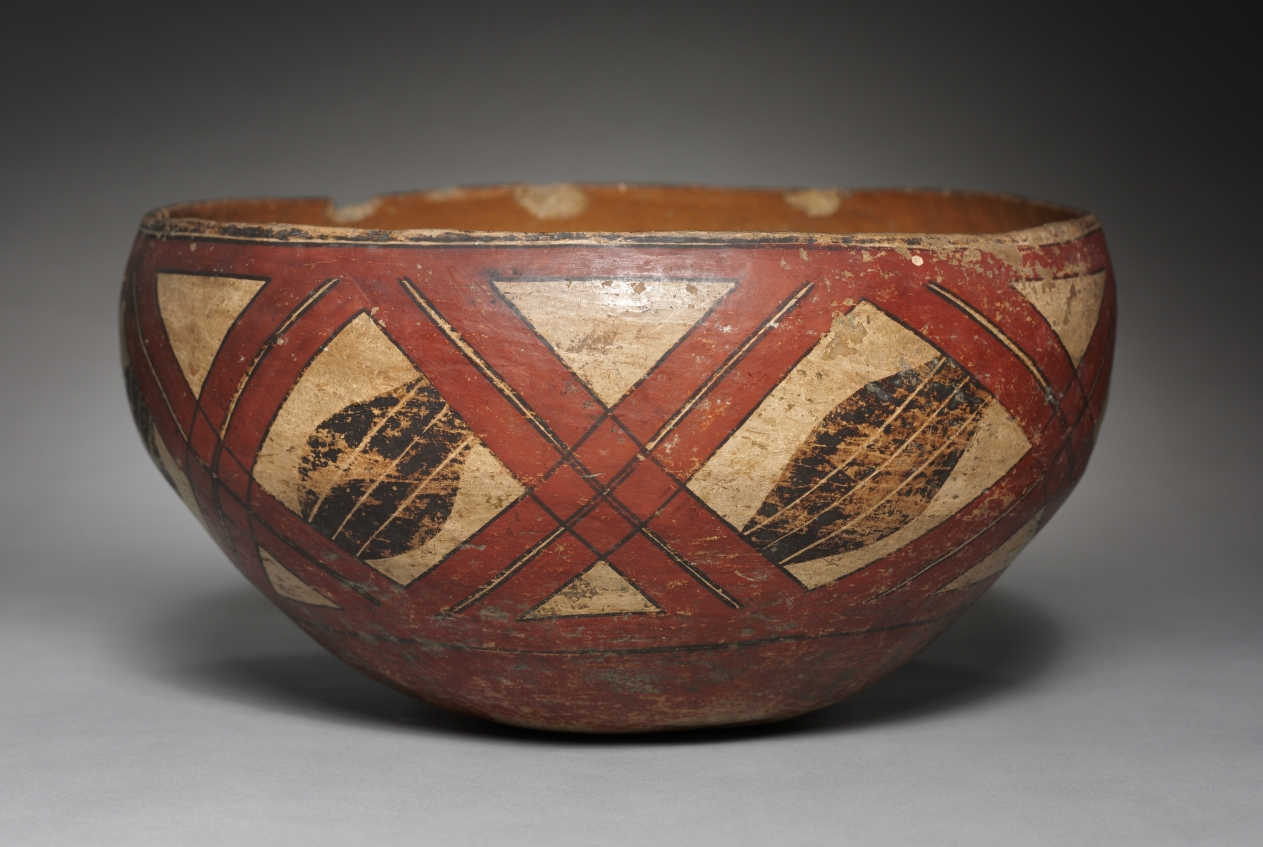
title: Stew Bowl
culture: Southwest,Pueblo, Acoma, Post-Contact Period, 20th century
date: 1860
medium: ceramic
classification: Ceramic